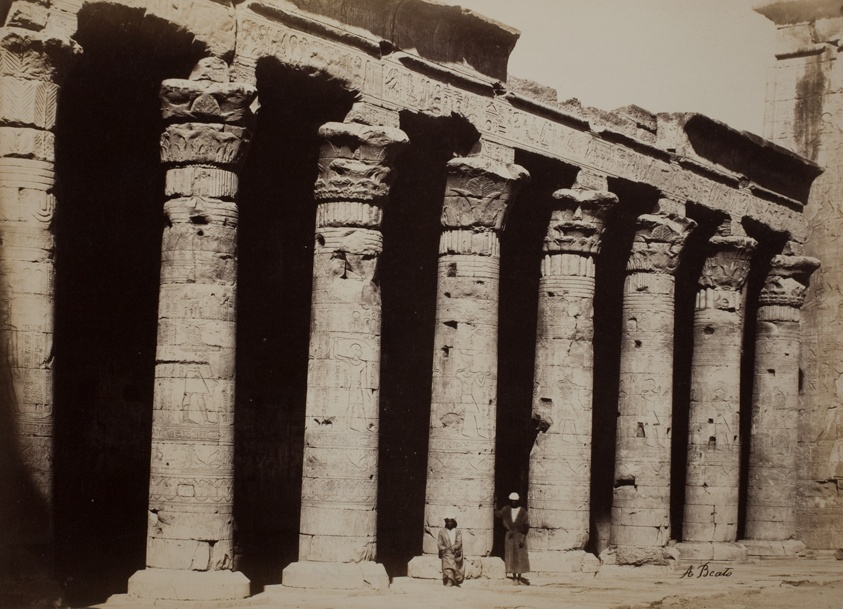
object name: Photograph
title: Temple, Egypt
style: 19th century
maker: Antonio Beato (Italian, c. 1825–c. 1906)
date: c. 1870s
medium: Albumen print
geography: Italy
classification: photograph; albumen silver print; photography